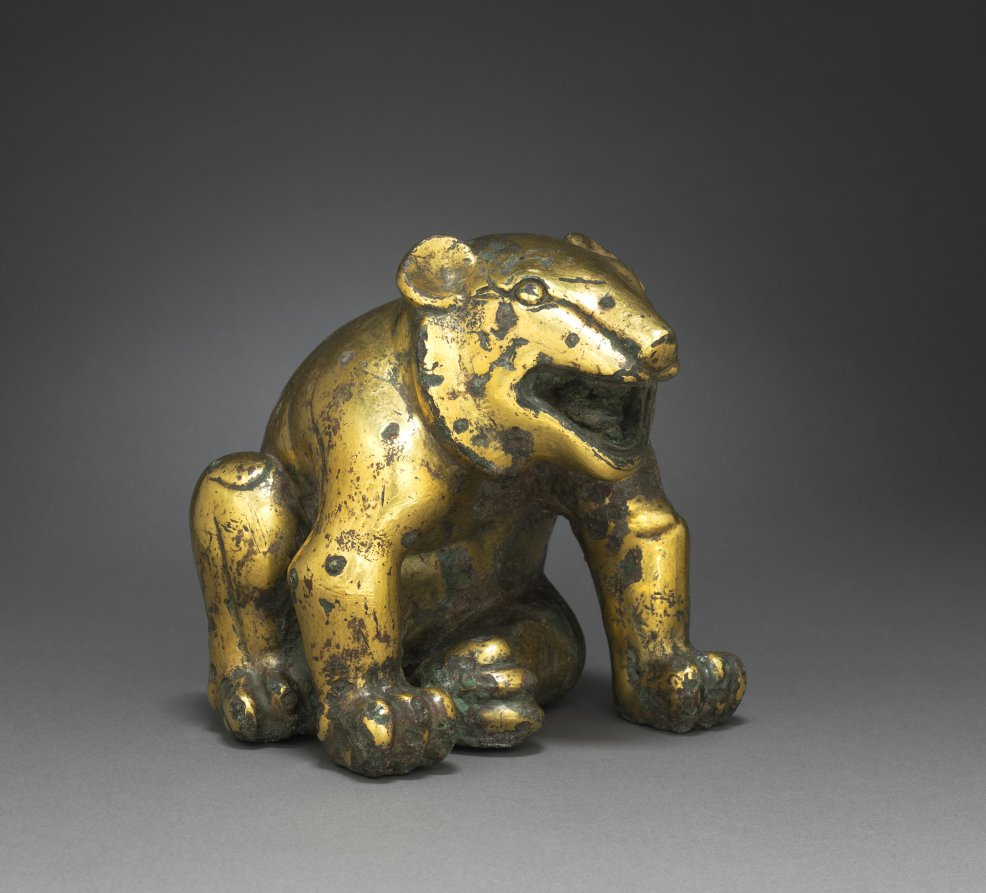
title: Mat Weight in the Form of a Bear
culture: China, Western Han dynasty (206 BCE–8 CE)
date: 202 BCE–9 CE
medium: gilt bronze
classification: Sculpture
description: The bear imagery was particularly popular during the Han dynasty and was a metaphor of heroic power. This heavy, solid bear was probably used as a mat weight; other small squatting bears often served as the legs of vessels.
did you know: Bear imagery, which symbolized heroic power, was particularly popular during the Han dynasty.